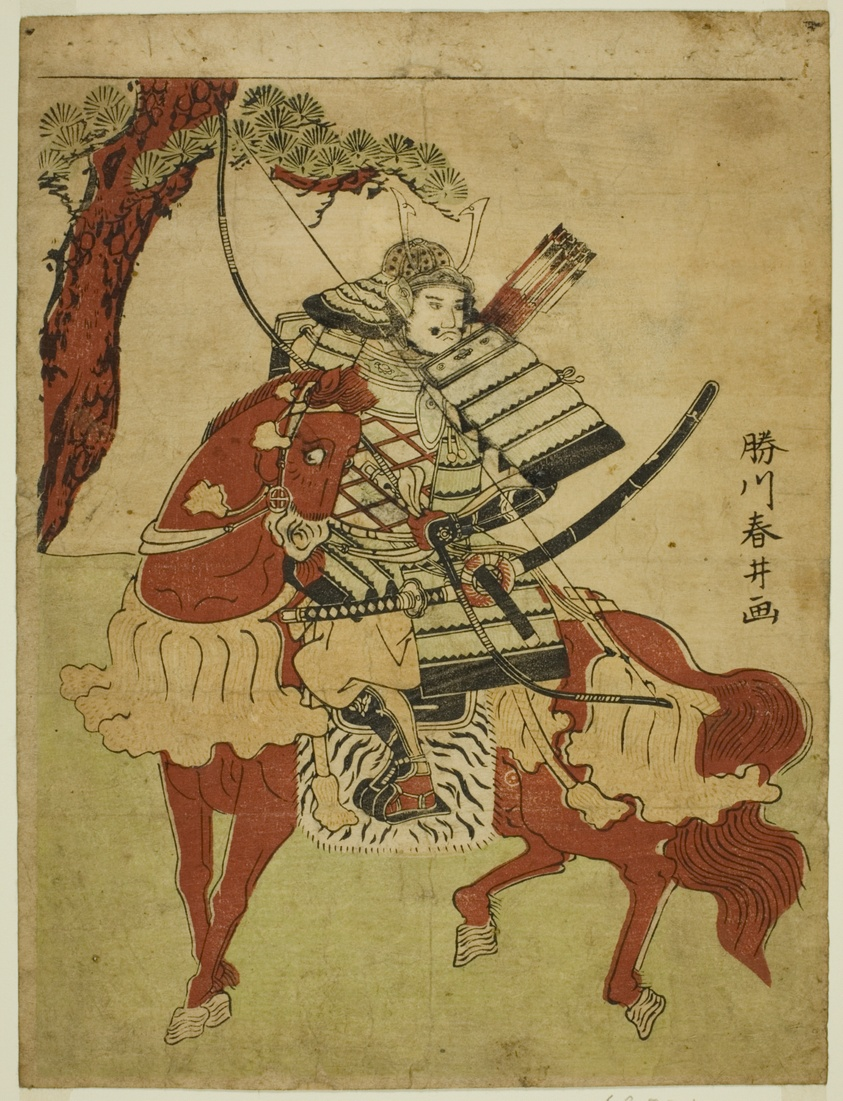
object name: Print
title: Warrior on Horseback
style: Japanese (culture or style)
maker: Katsukawa Shunsei (Japanese, active late 1780s-early 1790s)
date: late 1780s or early 1790s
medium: Color woodblock print; chuban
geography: Japan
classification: woodblock print; print; asian art